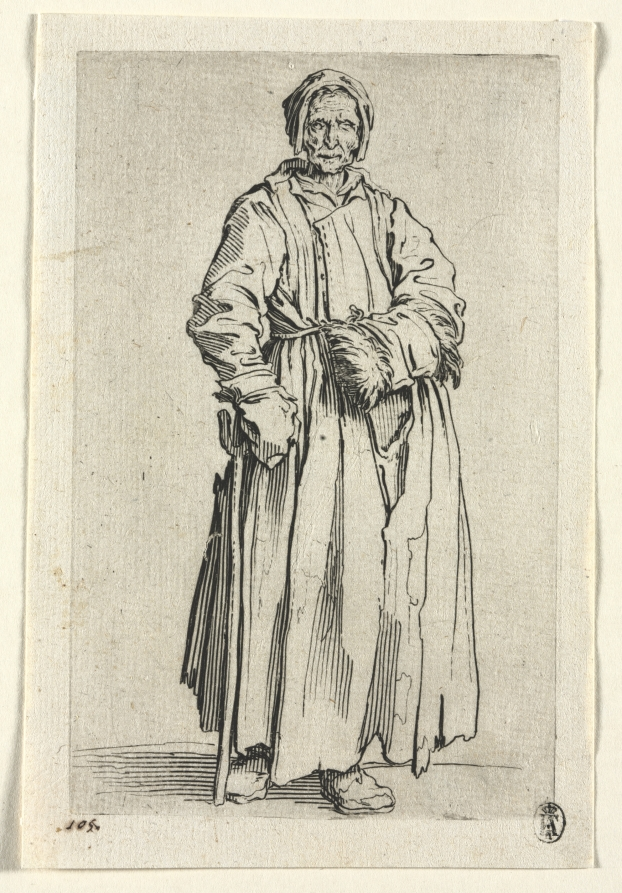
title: The Beggars: One-Eyed Woman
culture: France, 17th century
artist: Jacques Callot (French, 1592–1635)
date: c. 1623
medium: etching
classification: Print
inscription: Inscribed lower left in pen and brown ink: "105."